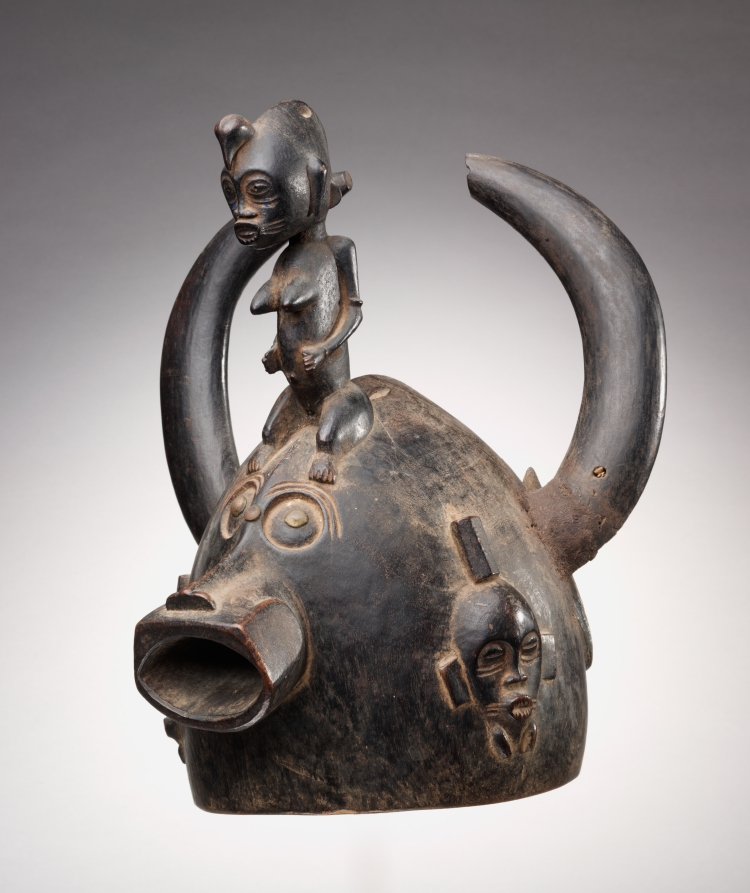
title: Helmet Mask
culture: Africa, West Africa, Côte d'Ivoire, Senufo-style carver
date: early to mid-1900s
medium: Wood, upholstery studs, and colorant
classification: Mask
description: This type of helmet was worn in rituals demonstrating a boy’s transition from one age group to the next, prior to his actual initiation into the secret Poro society. The pre-initiates were viewed as unknowing and anxious oxen, so the horns on such helmets may refer to those of horned cattle. The female figure alludes to women’s supernatural powers, which assure the welfare of Poro members.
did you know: Cowrie shells, feathers, and other accessories once decorated this helmet.